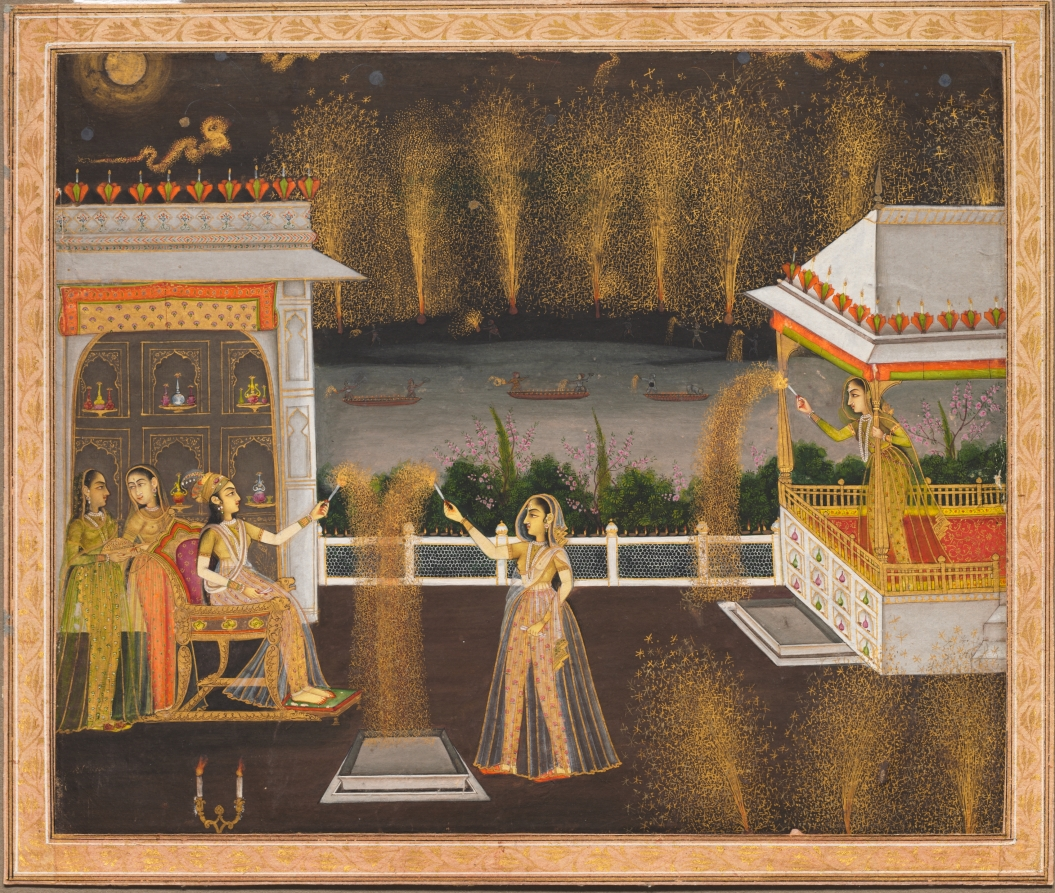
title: Royal Women Celebrating Diwali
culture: Northern India, Uttar Pradesh, Lucknow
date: c. 1760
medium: gum tempera and gold on paper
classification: Painting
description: Lined along the eaves, the top of the marble lattice railing, and the rims of the boats on the river are candles and butter lamps lit in celebration of a New Year festival. A princess on a golden armchair lights sparklers with her friends. In the boats and on the far shore men set off sparklers under the light of a magnificent firework display under the full moon. The style of this work is typical of Mughal painting from the mid-1700s, when scenes of domestic life among women of the court were a favorite subject for the imperial artists.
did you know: "Diwali" comes from the Sanskrit words dīpa (lamp) and āvali (rows or series).